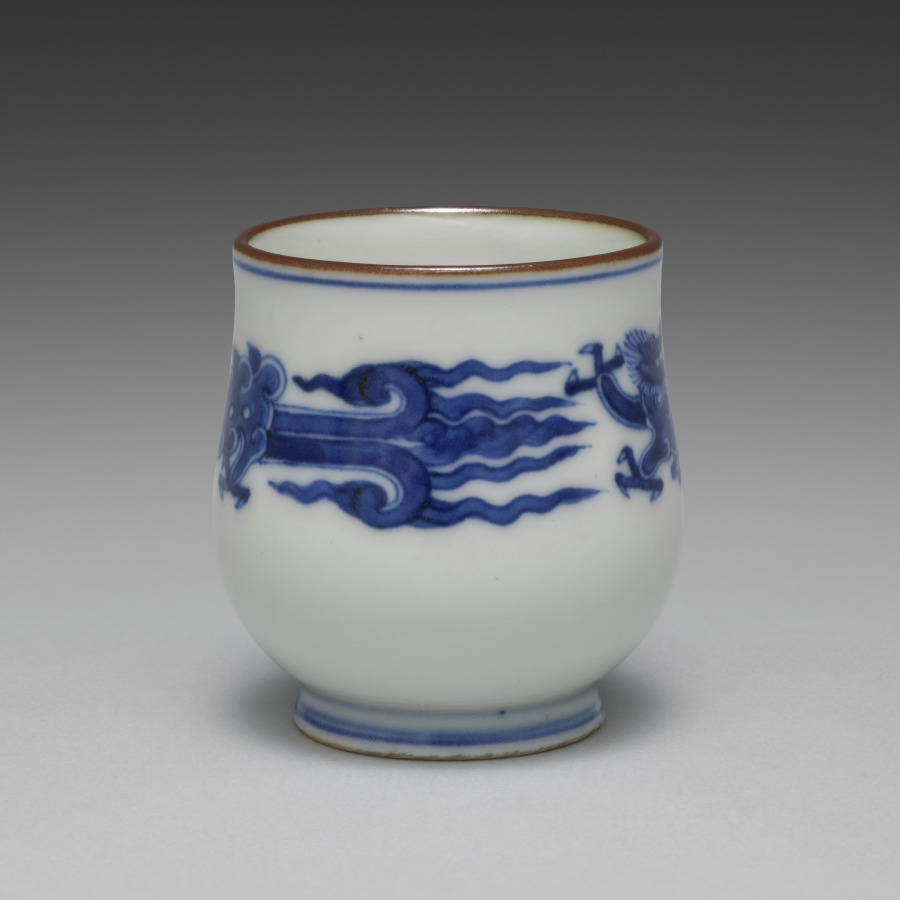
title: Cup from Sake Cups with Dragons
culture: Japan, Meiji period (1868–1912)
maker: Seifū Yohei III (Japanese, 1851–1914)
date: c. 1893–1914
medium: One from a set of six sake cups; porcelain with underglaze blue and iron oxide rims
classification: Ceramic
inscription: 大日本清風造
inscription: 清風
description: Each of these sake cups pictures two backward-looking dragons. The highly stylized creatures resemble jade carvings.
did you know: Seifū Yohei III was inspired by the Chinese mythical animals that were common on porcelain objects made at Jingdezhen in China during the Ming dynasty (1368–1644) and then exported around the world.